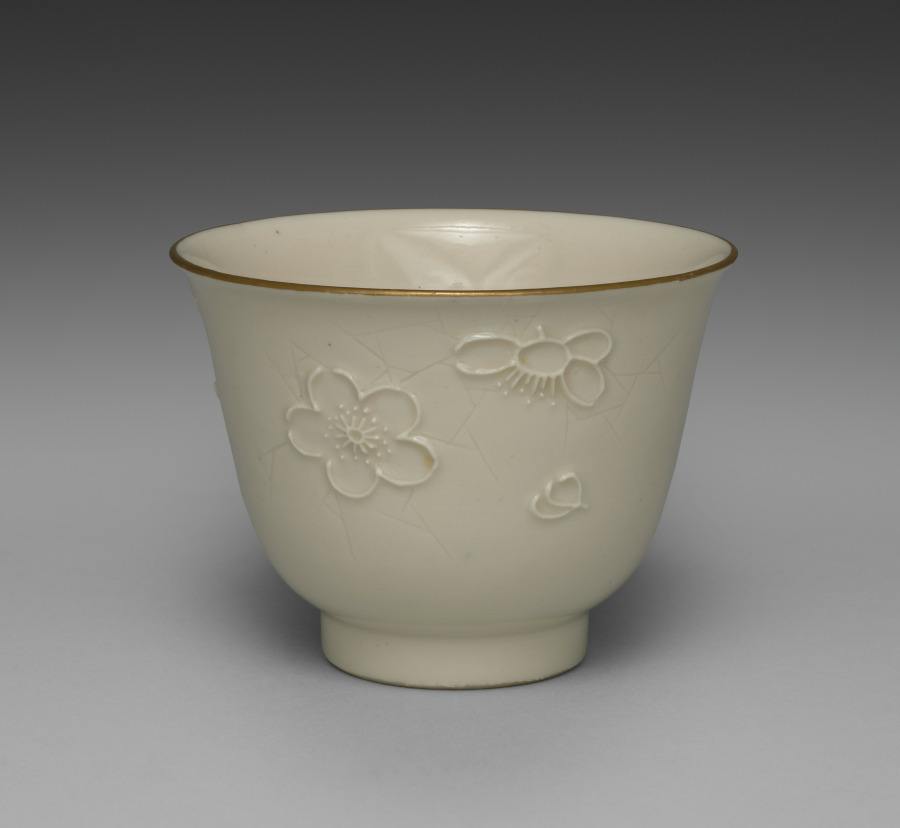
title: Drinking Cup from Dining Set with Plum Blossoms and Cracked-Ice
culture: Japan, Meiji period (1868–1912)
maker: Seifū Yohei II (Japanese, 1844–1878)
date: c. 1875–78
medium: Porcelain with molded designs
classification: Ceramic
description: Each item in this set has a delicate low-relief design of flowering plum branches over scattered, intersecting lines meant to resemble the cracked-ice surface of a frozen body of water and is signed on the base in gold pigment. While Yohei II produced many fine works in underglaze blue, like those produced by Kiyomizu Shichibei, he also made works in quite different styles later in his career, from the early 1870 s. In 1873, he was appointed purveyor to the Industrial Center of Kyoto Prefecture, a designation associated with Kyoto’s efforts to reach an international market through the port of Kobe; and from 1875 until his death, he was involved in national-level projects to present Japanese ceramics across the world. It was during this period that Yohei III was apprenticed to Yohei II, and it has been suggested that this set may in fact be an early example of Yohei III’s work, which he signed with his teacher’s name. Decorated with flowers resembling Japanese textile motifs, the set calls to mind the design of Yohei II’s pair of vases with plum blossoms in the Victoria and Albert Museum. Here, the elaborate trees created for a formal public exhibition setting have been translated into the approachable blossoms of the genteel domestic environment. While the designs are consistent across the pieces, each raised flower petal and pistil and each incised line in the ice was done by hand, so the cups, bowls, and dishes are similar yet unique. The bottoms of two boxes once identified the set’s owner, but the information has been deliberately obscured with black ink. However, inscriptions still visible appear to indicate two occasions, once at the end of July 1886 , and once again in June 1916 , when parts of the set were requested from Hokura in Niigata Prefecture. The location corresponds to a neighborhood in the present-day city of Jōetsu. The surname Tsuji 辻 also appears on a paper tag affixed to one of the box cloths. Future research may possibly reveal more about their provenance. A vase by Yohei III in a private collection combines the formal grandeur of the Yohei II vases in the Victoria and Albert Museum with the gentler design of this dining set, placing flowering plum trees against soft, scalloped-edge clouds resembling those in golden screens.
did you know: The dining wares have a creamy white coloration that the four boxes containing them identify as Korean in style.